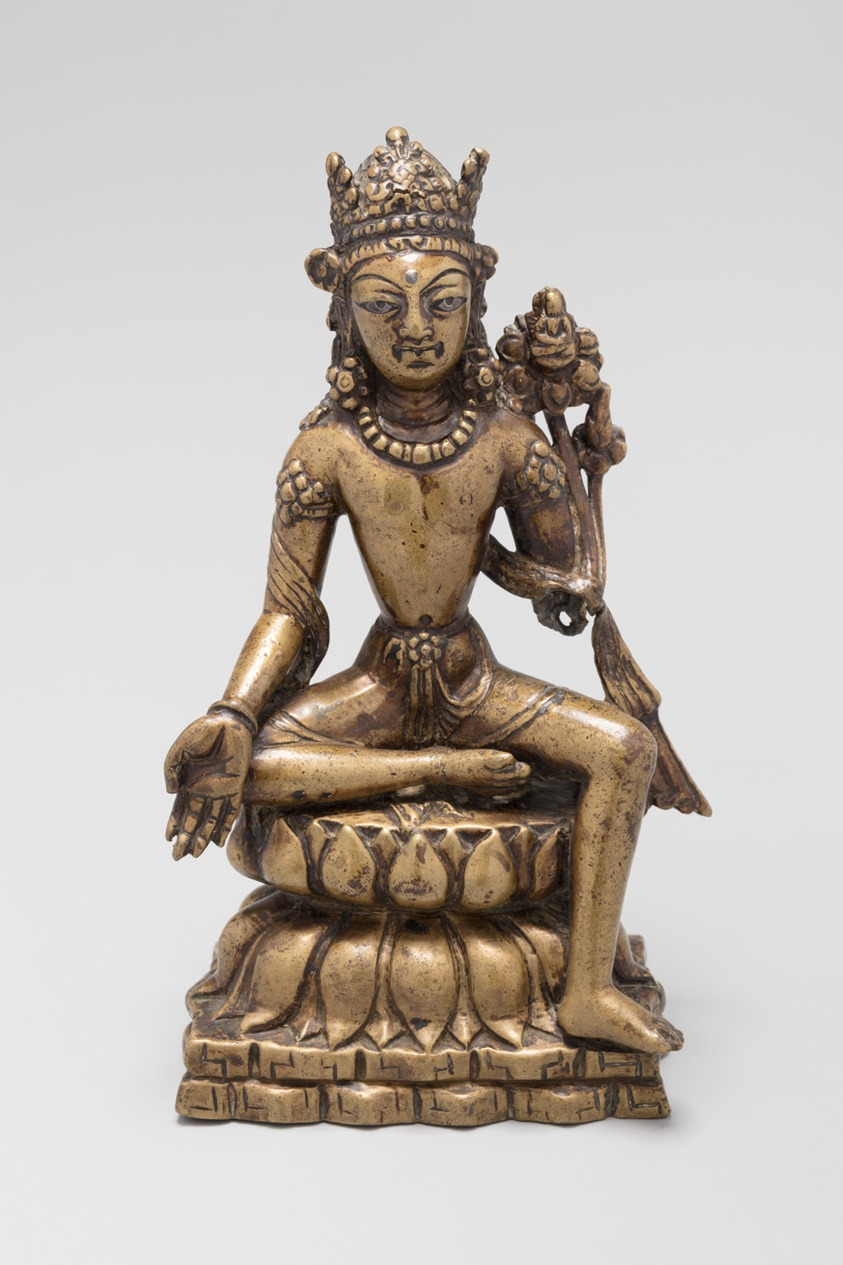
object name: Sculpture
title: Bodhisattva Avalokiteshvara Seated with Hand in Gesture of Gift Giving (Varadamudra)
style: South Asian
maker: Pakistan; Khyber Pakhtunkhwa Province, Swat Valley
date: 8th/9th century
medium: Brass inlaid with silver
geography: Swat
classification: brass; metal; sculpture; asian art